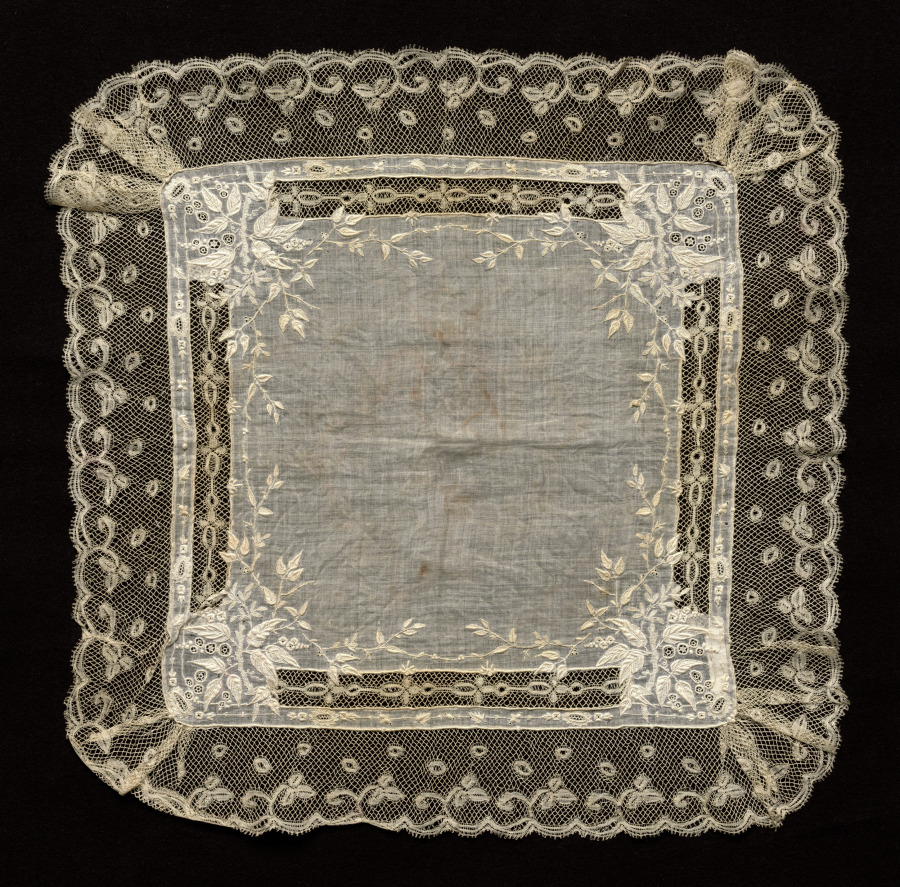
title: Lace Handkerchief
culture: France, Valenciennes or Flanders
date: 1800s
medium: Plain weave linen center: bobbin lace (Valenciennes) border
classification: Lace